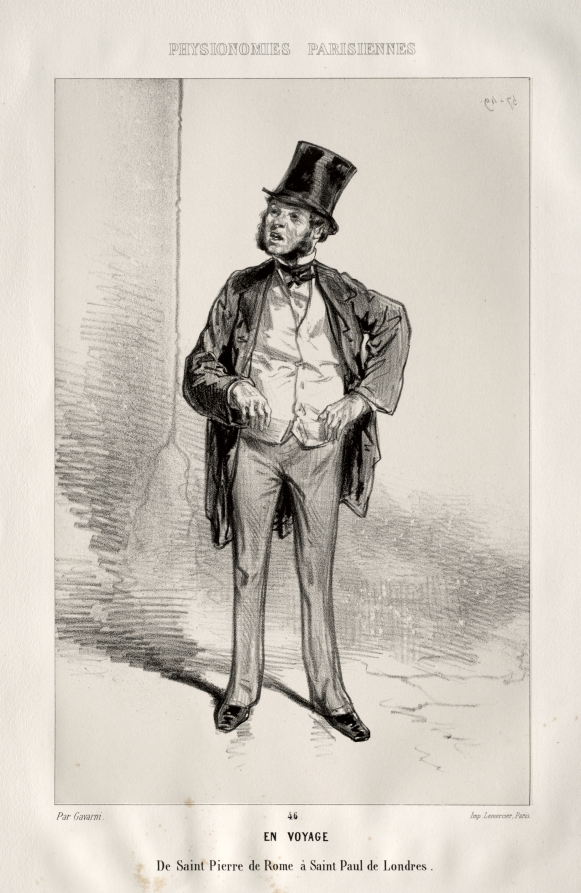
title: En Voyage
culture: France, 19th century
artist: Paul Gavarni (French, 1804–1866)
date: c. 1858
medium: lithograph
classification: Print